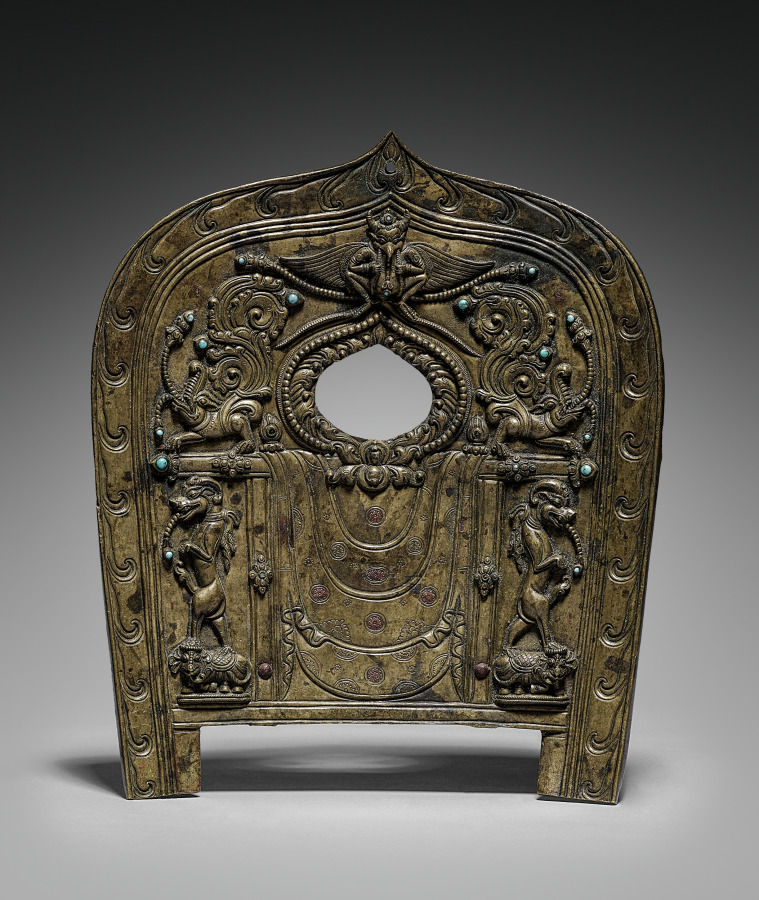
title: Halo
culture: Tibet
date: 1200s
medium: bronze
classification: Sculpture